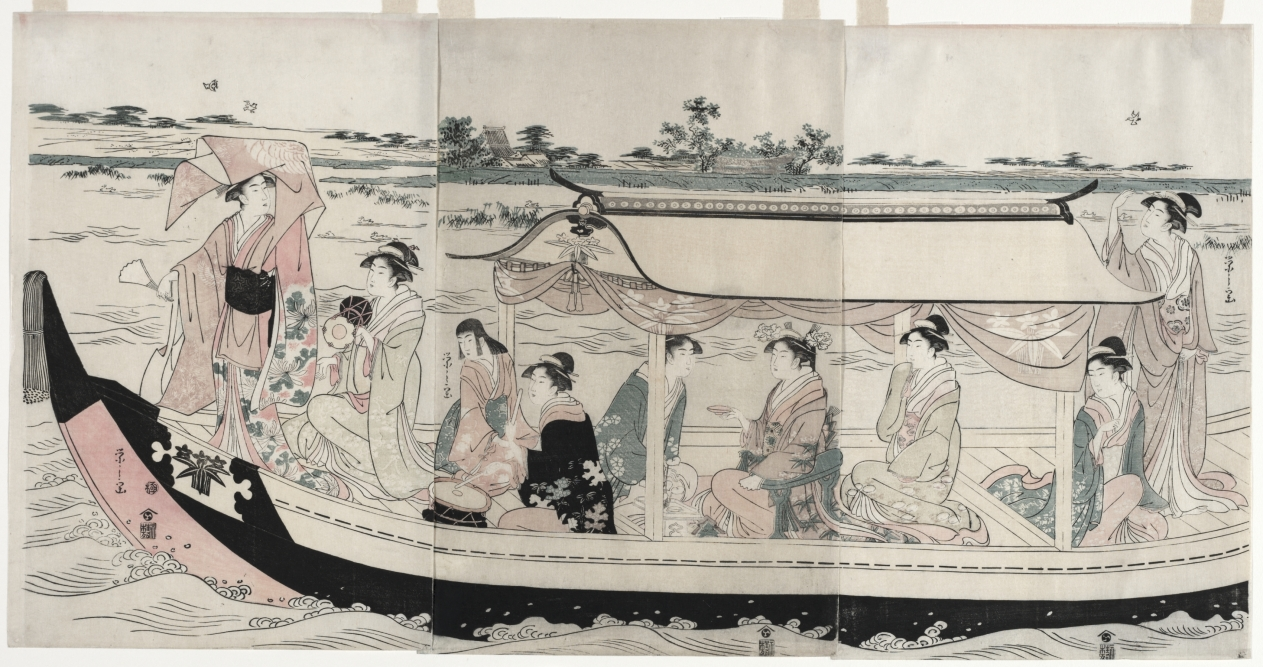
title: Women in a Pleasure Boat on the Sumida River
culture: Japan, Edo period (1615–1868)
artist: Chōbunsai Eishi (Japanese, 1756–1829)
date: early 1790s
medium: triptych of woodblock prints; ink and color on paper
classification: Print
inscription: Signature: Eishi ga Seal: Nishimuraya Yohachi (Eiju han, emblem).